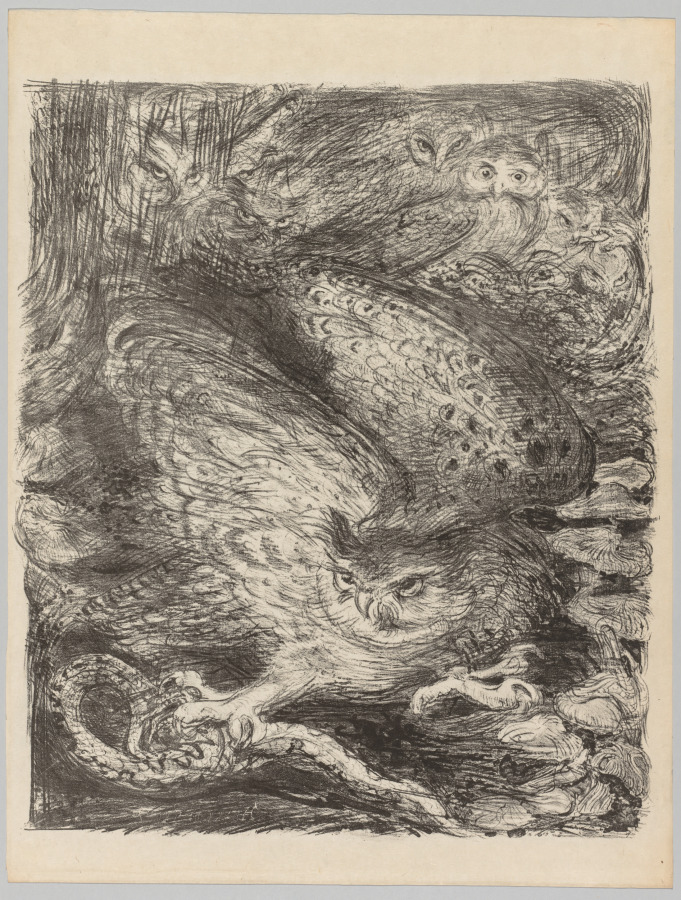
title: The Vintages!: Seven Owls and a Serpent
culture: Belgium, late 18th-early 19th century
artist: Henri de Groux (Belgian, 1867–1930)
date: c. 1900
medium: lithograph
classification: Print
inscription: lower left in stone: Henri de Groux (in reverse)